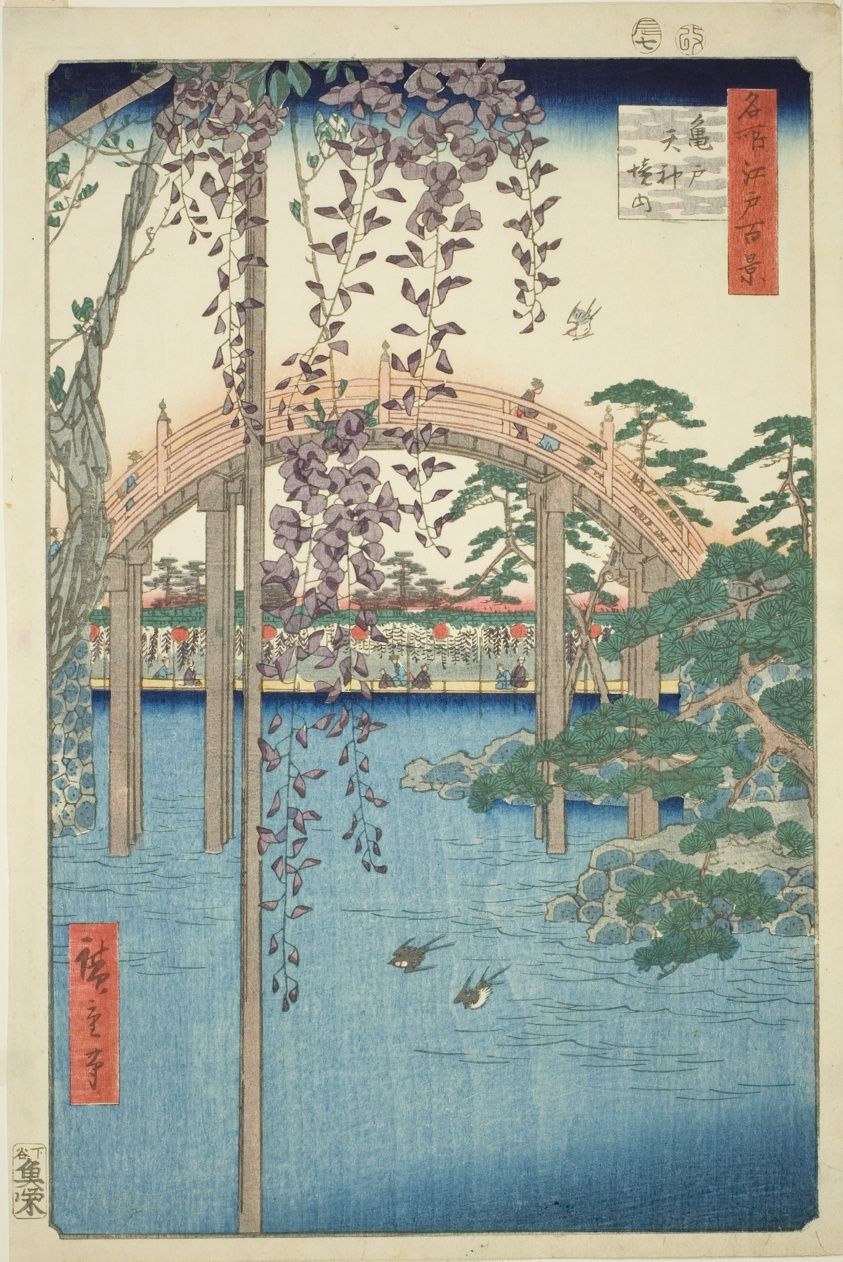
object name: Print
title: Precincts of Kameido Tenjin Shrine (Kameido Tenjin keidai), from the series "One Hundred Famous Views of Edo (Meisho Edo hyakkei)"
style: Japanese (culture or style)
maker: Utagawa Hiroshige 歌川 広重; Japanese, 1797-1858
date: 1856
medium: Color woodblock print; oban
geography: Japan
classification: woodblock print; print; asian art